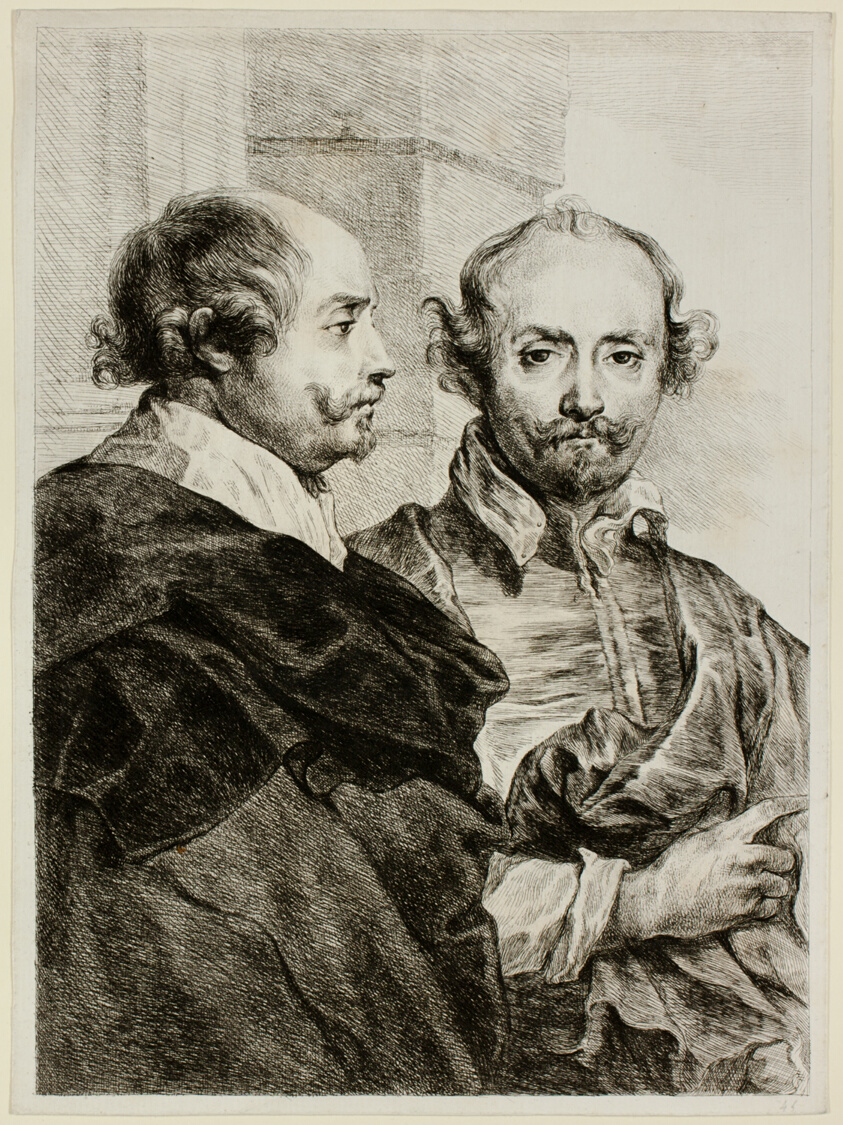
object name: Print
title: Two Portraits of a Man in Half-Length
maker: Dominique-Vivant Denon (French, 1747-1825); after Anthony van Dyck (Flemish, 1599-1641)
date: 1784/1815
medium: Etching in black on ivory laid paper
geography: France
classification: etching; paper; print; prints and drawing